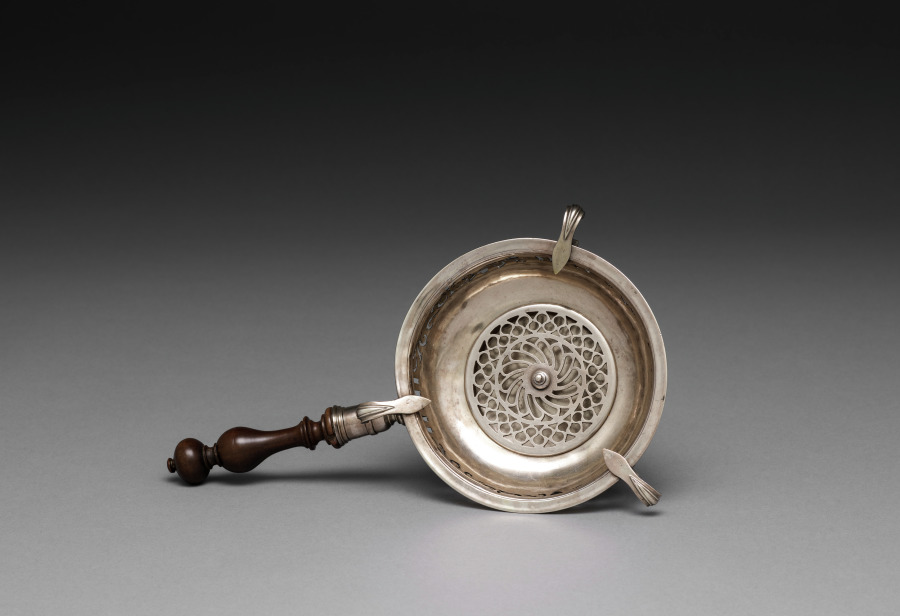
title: Chafing Dish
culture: America, Massachusetts and Connecticut, 18th century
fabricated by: John Potwine (American, 1698–1792)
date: c. 1730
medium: silver, wooden handle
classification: Silver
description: A small candle would have been placed under this dish for keeping the contents warm at the table.